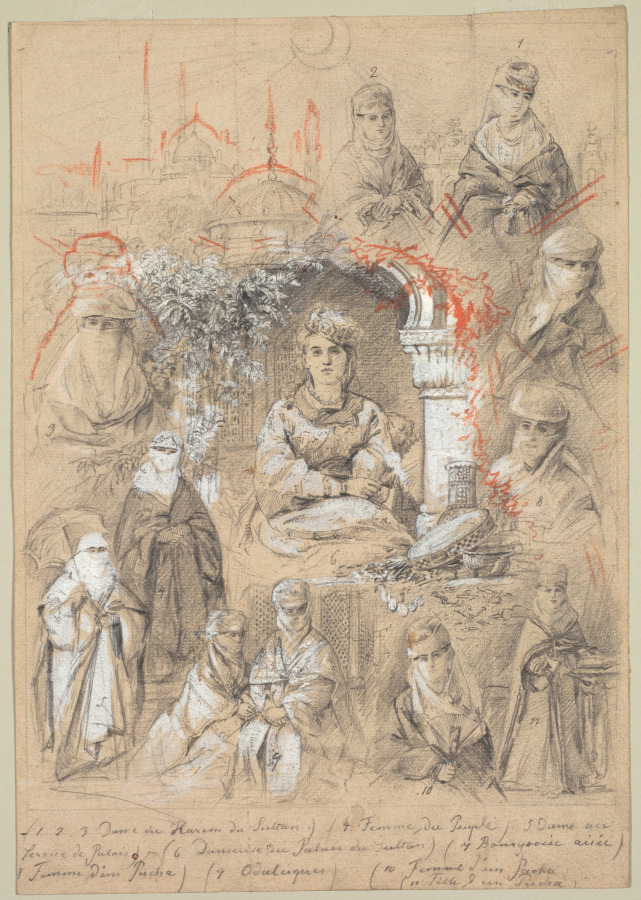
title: Harem Women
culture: France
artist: Anonymous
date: 1800s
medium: Graphite with white heightening and orange pastel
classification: Drawing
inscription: Lower margin, in graphite: (1. 2. 3. Dame du Harem du Sultan) (4. Femme du Peuple) 5. Dame au / service du Palais) (6. Danseuse du Palais du Sultan) (7. Bourgeoise aisée) / 8. Femme d'un Pascha) (9. Odalisque) (10. Femme d'un Pascha / (11 Fille d'un Pascha) In graphite, upper margin: 2; in graphite, upper right corner: 1; in graphite, left center margin: 3; in graphite, center left: 4; in graphite, lower tier of women: 5; 9; 10; 11; in graphite, right center margin: 8; in graphite, right upper margin: 7 Verso, upper right corner: 14 1/3 . 32 ½